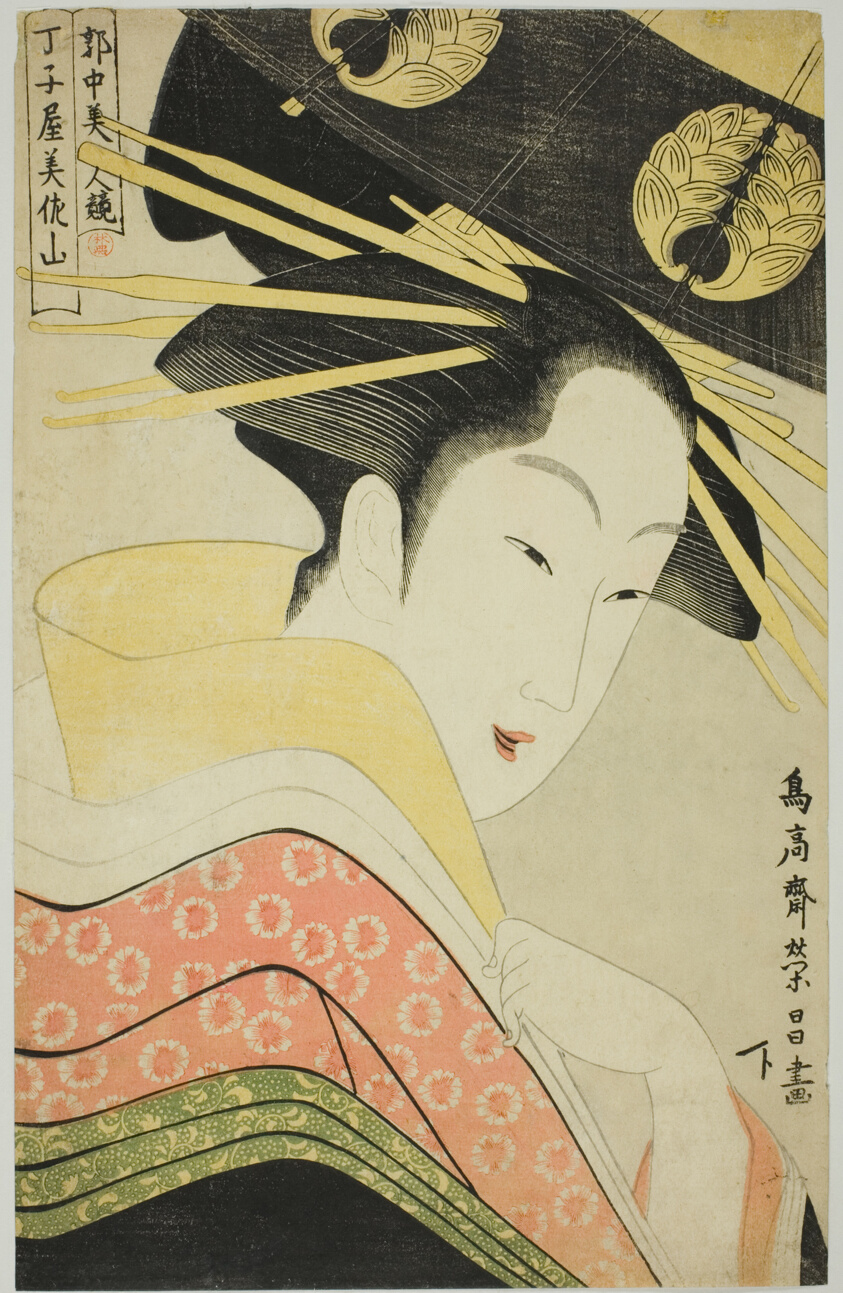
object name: Print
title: Misayama of the Chojiya, from the series Beauties of the Licensed Quarter (Kakuchu bijin kurabe)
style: Japanese (culture or style)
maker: Chokosai Eisho (Japanese, active 1780-1800)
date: c. 1795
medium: Color woodblock print; oban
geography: Japan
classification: woodblock print; print; asian art